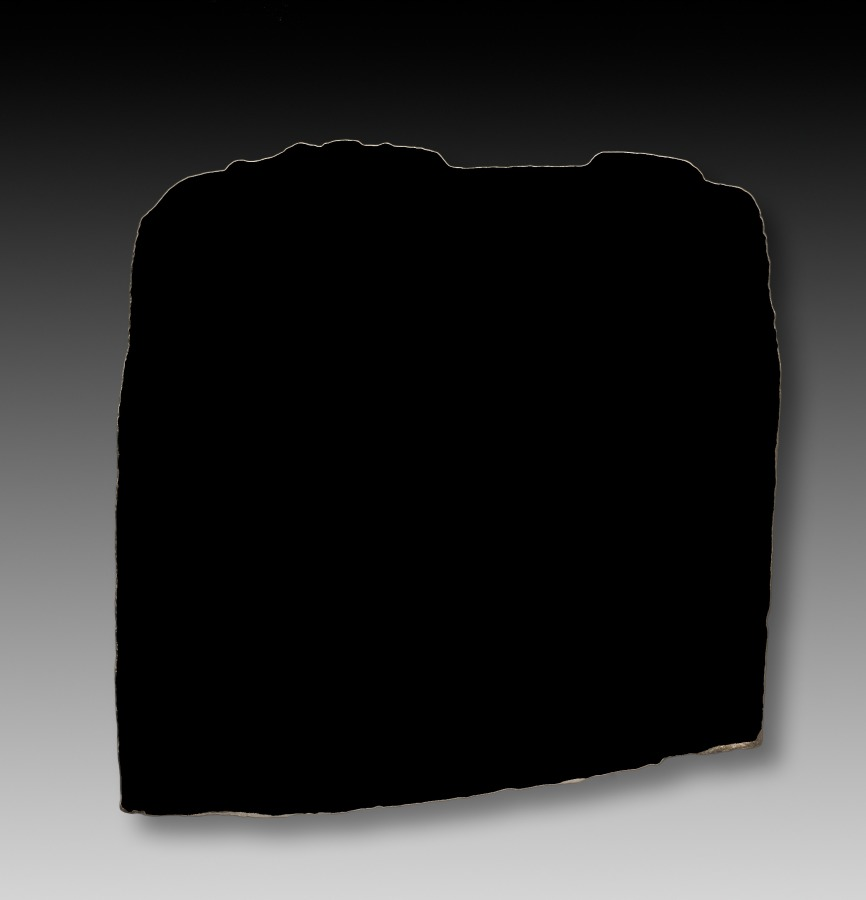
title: Stela Fragment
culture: Mexico, Veracruz?, 600-950 AD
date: 600–950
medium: limestone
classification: Sculpture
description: Figures appear on two sides of this fragmentary stela (upright stone slab carved in relief). One seems to represent a grimacing warrior who brandishes a club; arrow-like darts festoon his belt and hair. On the other side is a skeleton with one fleshed hand, perhaps a sacrificed captive. The eagle with a leaf in its mouth is a hieroglyph that may identify the captive's name.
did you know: The skeletal being resembles a low-relief stucco death figure on the wall of Tomb 1 in Zaachila.